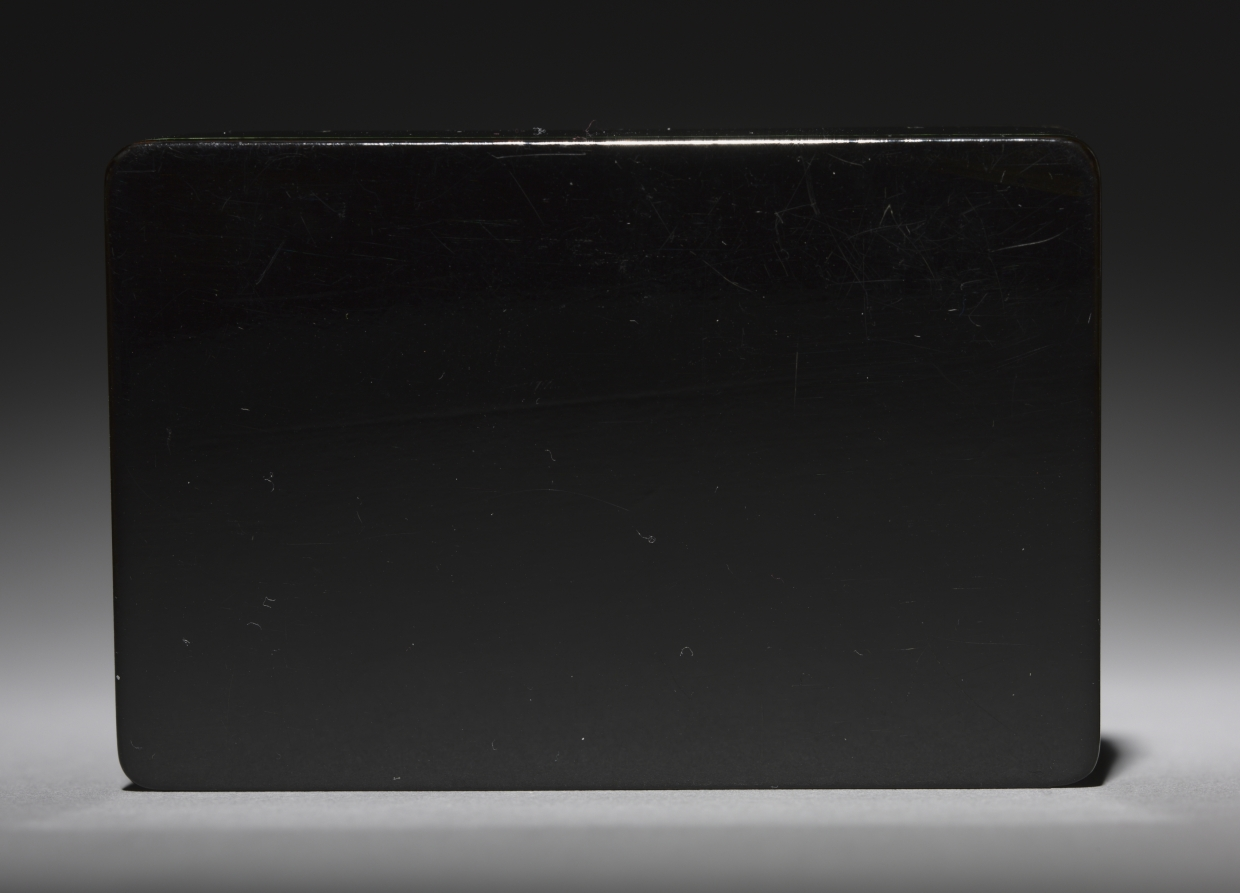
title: Snuff Box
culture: Russia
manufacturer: Lukutin Factory (Russian, 1818–1904)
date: 1800s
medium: wood with black lacquer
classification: Miscellaneous